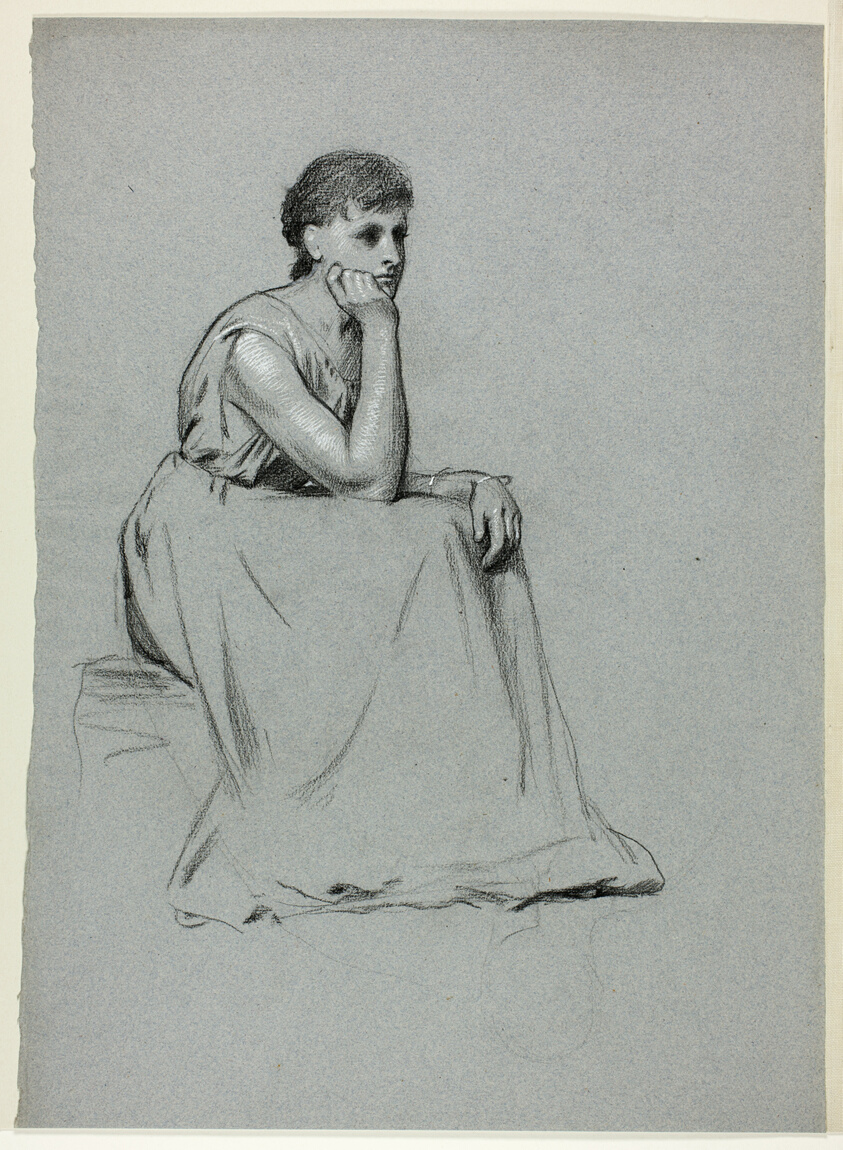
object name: Drawing and Watercolor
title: Seated Woman Resting on her Elbow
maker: Henry Stacy Marks (English, 1829-1898)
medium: Black pastel, heightened with white gouache, on blue laid paper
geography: England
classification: pastel; drawings (visual works); prints and drawing